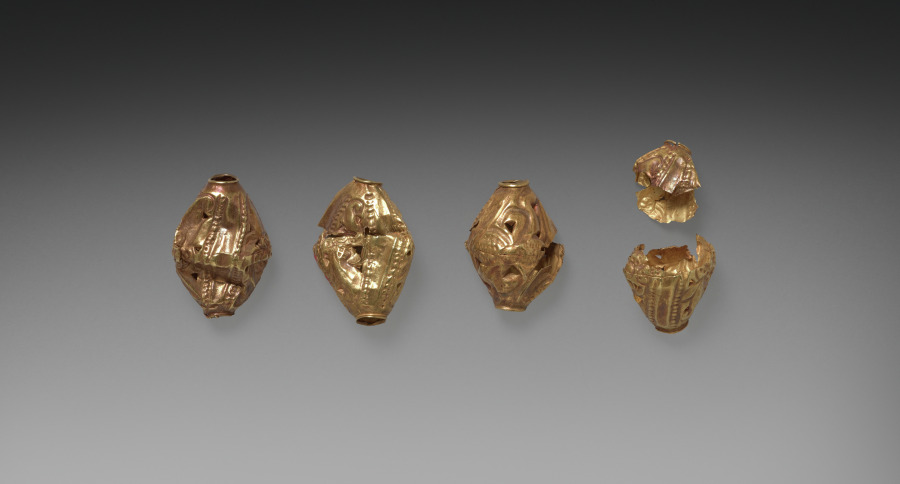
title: Beads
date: after 1519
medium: gold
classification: Jewelry